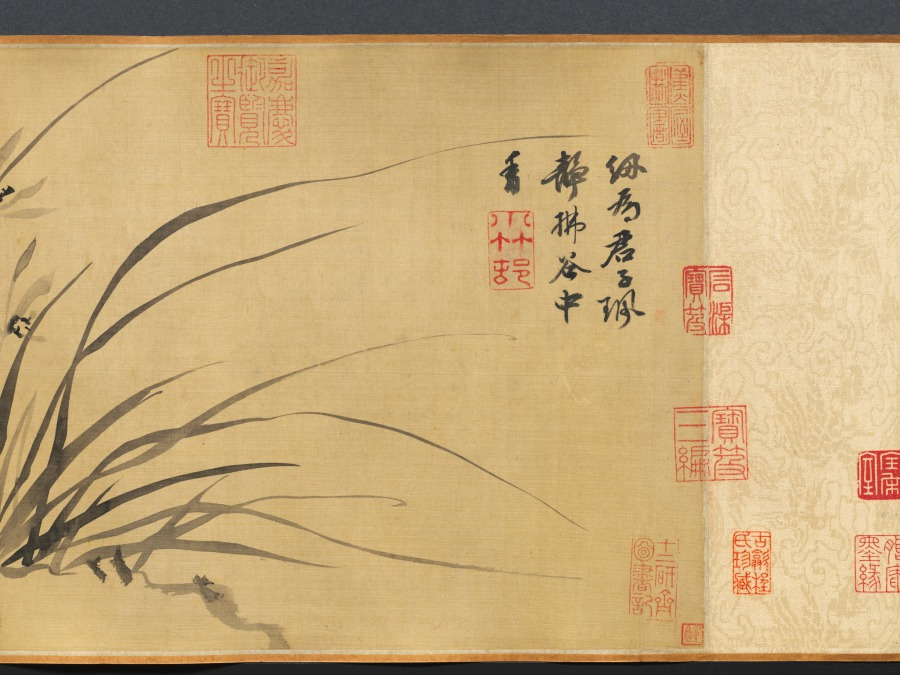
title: Flowers of Four Seasons, with Poems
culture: China, Ming dynasty (1368–1644)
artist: Wang Guxiang (Chinese, 1501–1568)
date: 1531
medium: handscroll; ink and light color on silk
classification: Painting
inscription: Artist's inscription, signature, and 15 seals. Ink Orchids. Sewn as pendants for the man of worth, swaying quiety, fragrance in the valley. [seal] Hsiao-chu ts'un Peony. Wiping his face, the young gentleman Ho [Ho Yen of Wei, Three Kingdoms] appears to have been powdered. His previous life was the perfume-stealing Han Shou [of Chin, 265–419 CE], the fragrance still lingers. [seal] Ts'un-wu chai. Flowering Crab Apple, New Bamboo. Shao-lin [Du Fu, 712–770] had to put down his brush. [Flowering Crab Apple]. Yü-k'o [Wen T'ung, d. 1079) in vain wrote poems about [Bamboo]. [seal] Yu-shih. Lotus Flowers. When she turns her head, half-hidden by a fan, and casts a glance, all the beautiful women become colorless. [seal] K'ang yüeh huai. Loquat. Ripeness in summer. [seal] Lu-chih. Pomegranate Flower. Whenever I remember you I will send my thoughts, but where have you gone--the [skirt] of pomegranate red? [seal] Wu-ho Sheng. Day Lily. Plant the day lily to forget sorrow. [seal] Yu-shih. Chrysanthemum. The untrammelled joy at the eastern fence. [seal] Lu-chih. Begonia. Comparing it to the beauties of Spring, and spreading them out as trimming for the stone steps. [seal] Yu-shih. Hibiscus. In recent years I have always enjoyed looking at flowers; instead of dark red I preferred pink ones. [seal] Jen-sheng i-lou. Narcissus, Camellia. The jade girdle left behind at Lo River. [Narcissus]. The precious pearls glitter before Spring. [Camellia]. [seal] Lu-chih. Heavenly Bamboo (Nandina domestica). A single branch in the wintry season. [seal] K'ang yüeh huai. Plum. Fragrant snow in the Lo-fou Mountains. [seal] Ts'un-wu chai. In the eleventh lunar month of the hsin-mao year of the Jiaqing era [1531], [I] imitated the boneless style of Yüan masters in sketching from life. Guxiang [seals] Yu-shih; Lu-chih. Translated by Wai-kam Ho/Lingyun Shih Liu (1980)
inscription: 2 colophons and 23 additional seals: 1 colophon dated 1632, and 2 seals of Li Jih-hua [Li Rihua] 李日華 (1565–1635); 1 colophon and 2 seals of Xiang Shengmo 項聖謨 (1597–1658); 3 seals of Liang Qingbiao 梁清標 (1620–1691); 6 seals of the Jiaqing 嘉慶 emperor (r. 1796–1820); 9 seals of Ch'eng Ch'i [Cheng Qi] 程琦 (1911–1988)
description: In this painting, flowers are loosely arranged by the seasons: narcissus and peony represent early spring; yellow loquat and lotus, summer; chrysanthemum, autumn; and the plum and evergreen bamboo, winter. The artist added to each flower a poetic line of calligraphy associating each plant with a historic or legendary figure. For example, the chrysanthemum, along with the line “The untrammeled joy at the eastern fence,” refers to the poet Tao Yuanming (died AD 427) who enjoyed chrysanthemums at the eastern fence in his garden. The scroll illustrates Wang Guxiang’s mastery of free brushwork, combining light monochrome ink with transparent colors. In his inscription, Wang says he used the “boneless” style without outlines as developed during the Yuan dynasty (1279–1368). Wang was a native of Changzhou, a city in southeast China known for its rich flora and fauna, and flower-and-bird painting tradition.